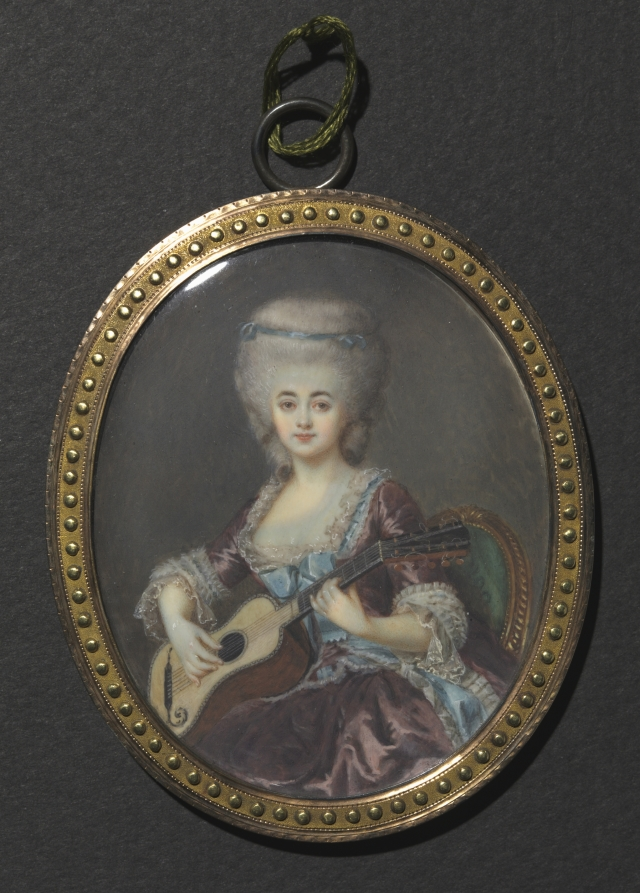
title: Portrait of a Woman with a Guitar, called Louise D'Aumont, Mazarin, Duchesse d'Aumont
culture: France, 18th century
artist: Antoine Vestier (French, 1740–1824)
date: late 18th century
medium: watercolor on ivory in gold mount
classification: Portrait Miniature